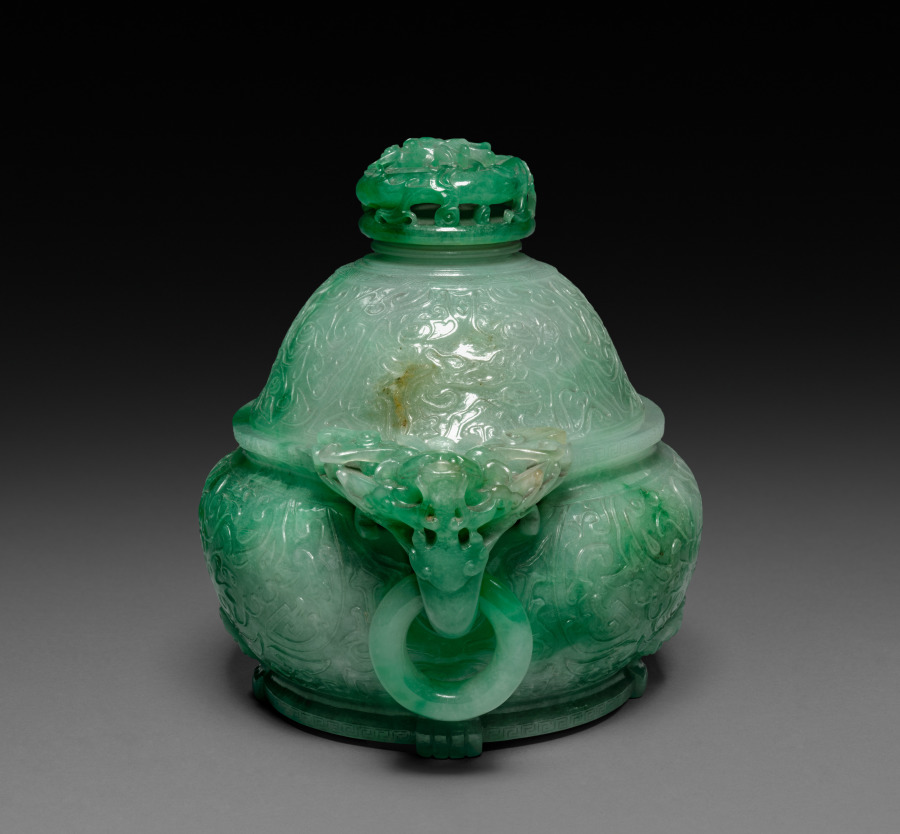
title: Incense Burner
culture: China, Qing dynasty (1644–1911), Qianlong reign (1736–95)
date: 1736–95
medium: jade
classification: Jade